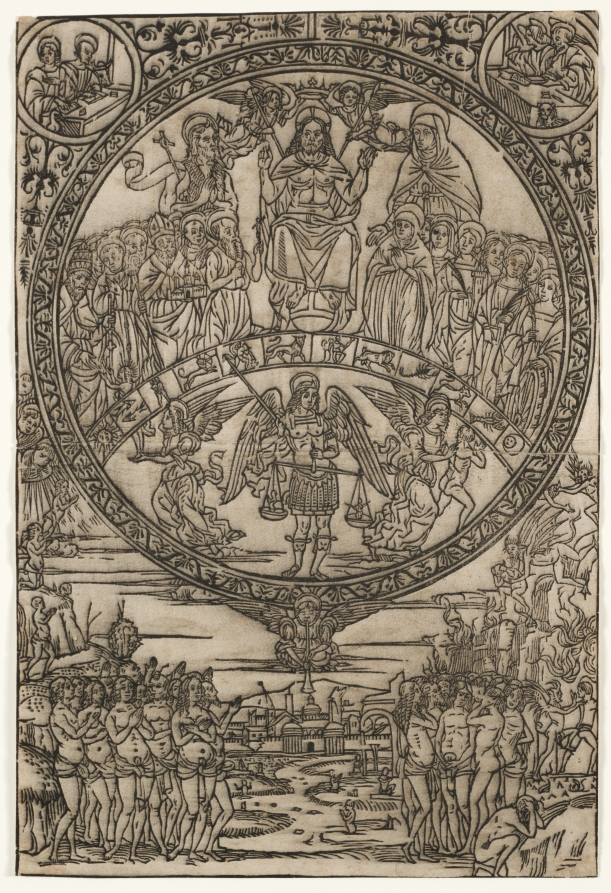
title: The Last Judgment in the Presence of the Saints and the Archangel Michael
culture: Italy, 15th century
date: 1400s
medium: woodcut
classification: Print